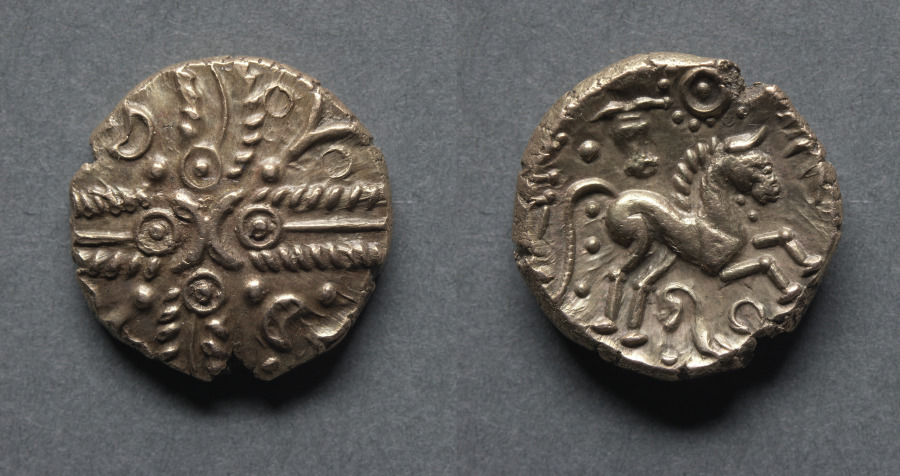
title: Tasciovanus Stater: Crossed Wreaths (obverse); Horse and Bucranium (Head of Ox) (reverse)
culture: England, Catuvellauni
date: 20 BCE–10 CE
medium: gold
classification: Coins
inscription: TASCIAV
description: Tasciovanus was the first king of the Catuvellauni to put his name on his coins; otherwise he is completely unknown to history. It is based on earlier coin designs with the addition of a legend containing an abbreviation of his name and a bucranium (head of an ox) above the horse. Often earlier coins are badly executed, causing elements of the design to be cut off, as seen here.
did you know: The Catuvellauni were a Celtic tribe or state of southeastern Britain before the Roman conquest.